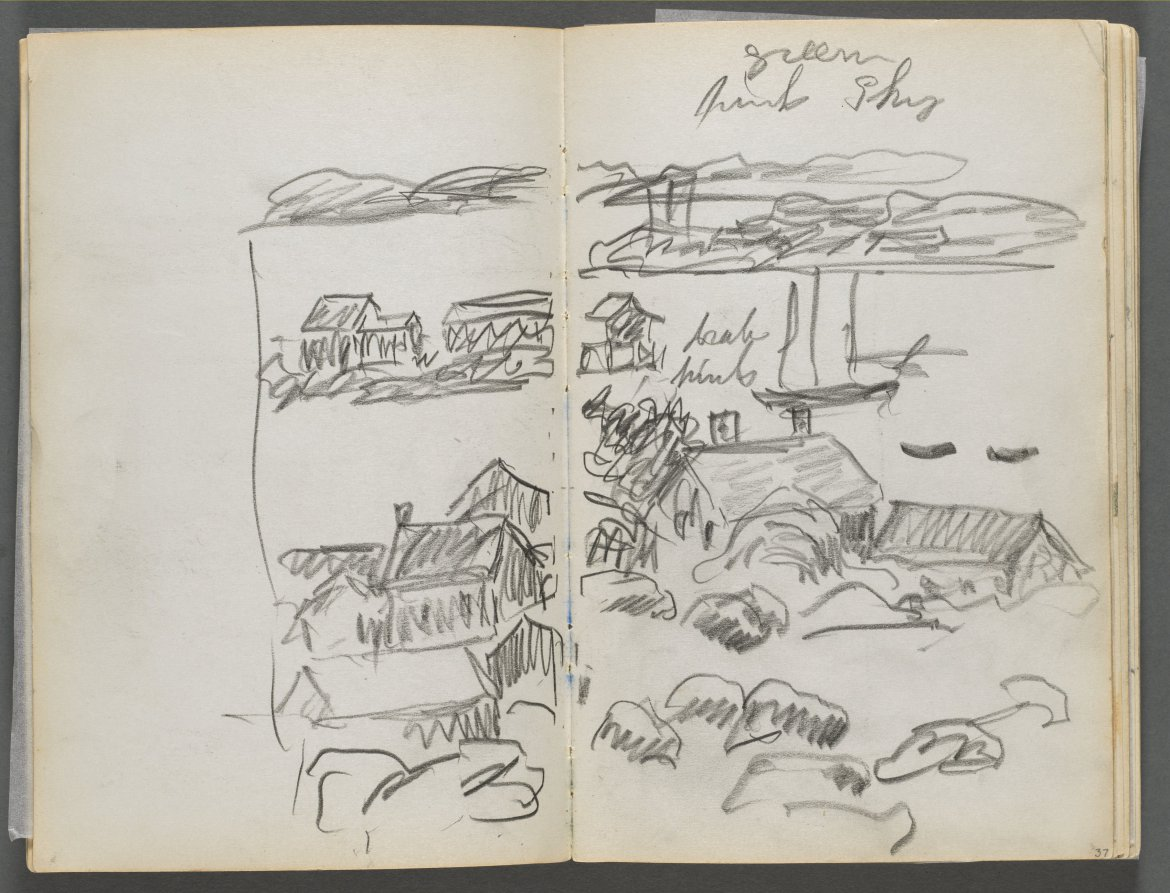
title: Sketchbook, The Dells, N° 127, page 036 & 37: View of a Cove from above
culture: America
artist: Maurice Prendergast (American, born Newfoundland [now Canada], 1858–1924)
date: c. 1919–1921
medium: graphite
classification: Bound Volume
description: This sketchbook contains 59 pages of graphite drawings and 16 watercolors made at various locations on Cape Ann, Massachusetts.